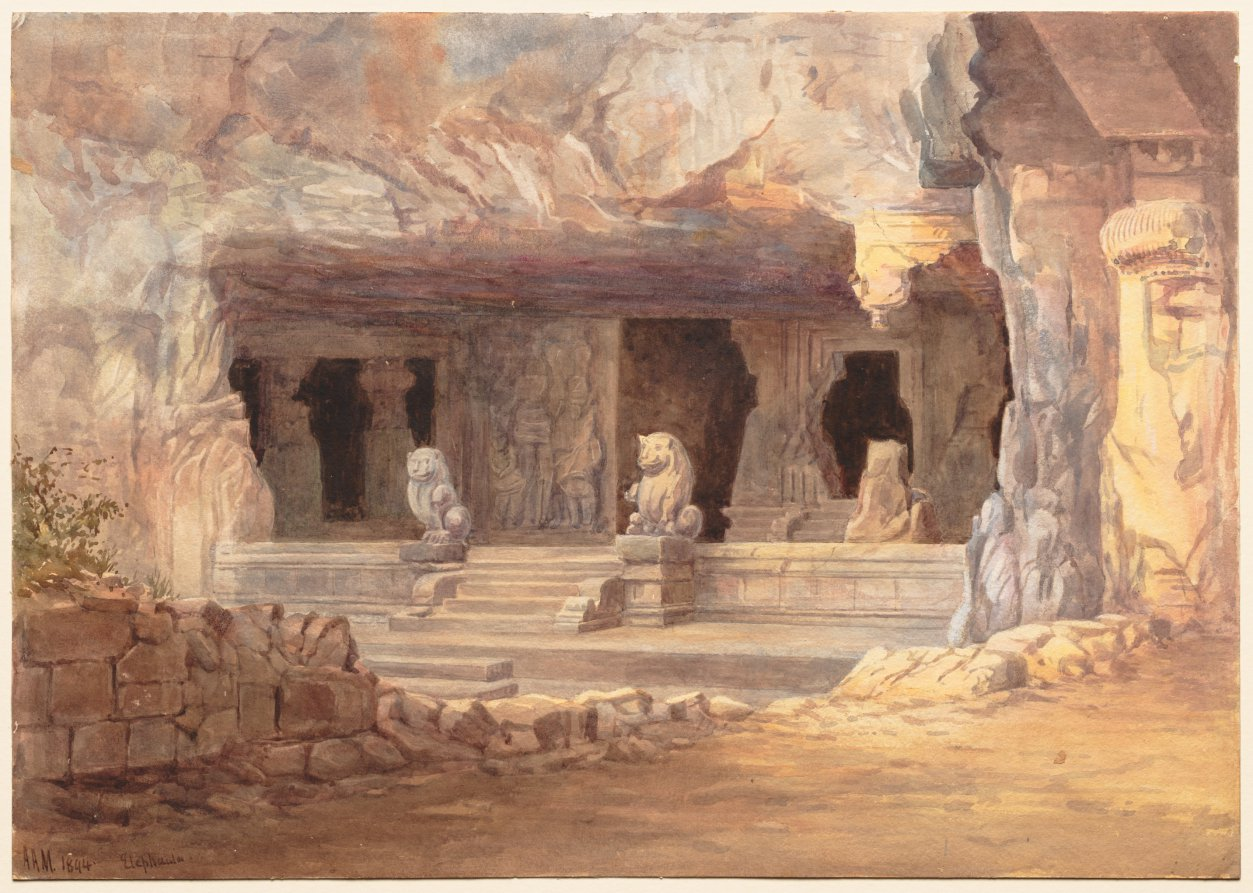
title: View of Elephanta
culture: England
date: 1894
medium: watercolor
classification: Drawing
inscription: Signed in lower left: "A.A.M. 1894"